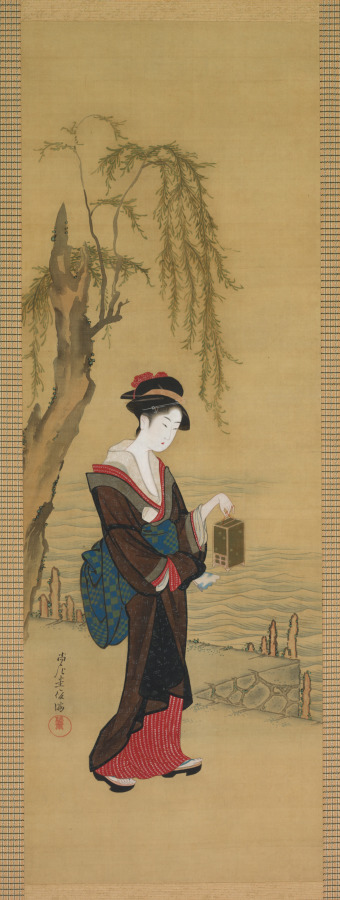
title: Beauty with Fireflies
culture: Japan, Edo period (1615–1868)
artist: copy after Kubo Shunman (Japanese, 1757–1820)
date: early 1800s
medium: Hanging scroll; ink and color on silk (ivory roller ends)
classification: Painting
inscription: Signed at lower left: 尚左堂俊満 Shōsadō Shunman Sealed at lower left: round red seal：俊満 Shunman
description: A young woman has passed beneath an aged willow tree as she strolls along a riverbank carrying a cage full of fireflies. The painting is a copy after Kubo Shunman, best known as a composer of witty verses in 31-syllables (kyōka) and designer of limited edition prints called surimono. Shunman was active during the mature era of ukiyo-e production, and his more formal paintings most often took as their subjects beautiful Chinese or Japanese women. Here, his imitator commemorates one of summer's most delightful evening pastimes, the observation of the flickering lights of the firefly. The woman is presented in a ubiquitous summer setting, a refreshingly cool and breezy riverbank in earshot of rustling willow leaves.